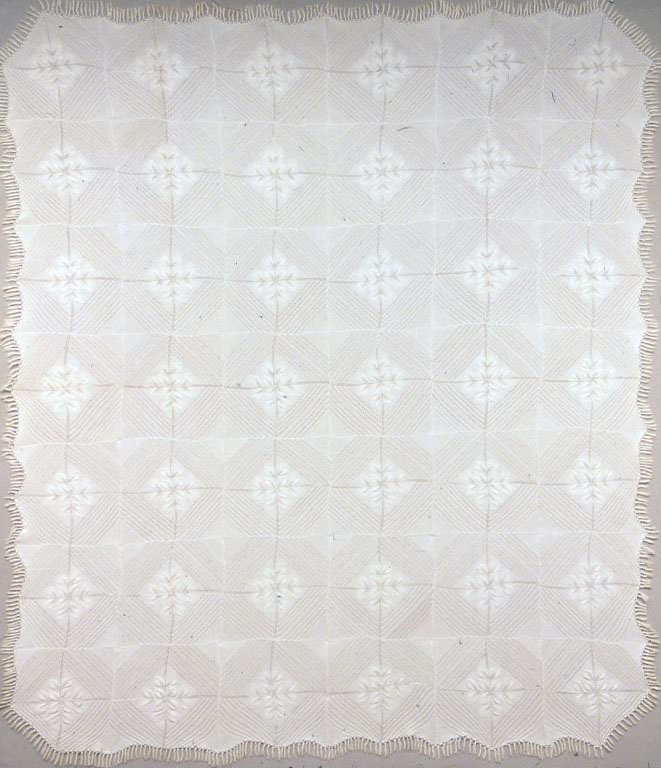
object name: Textile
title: Bedcover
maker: United States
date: 1850/1900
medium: Cotton, knitted; edged with knotted fringe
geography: United States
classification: textile; needlework (visual works); needlework - quilt